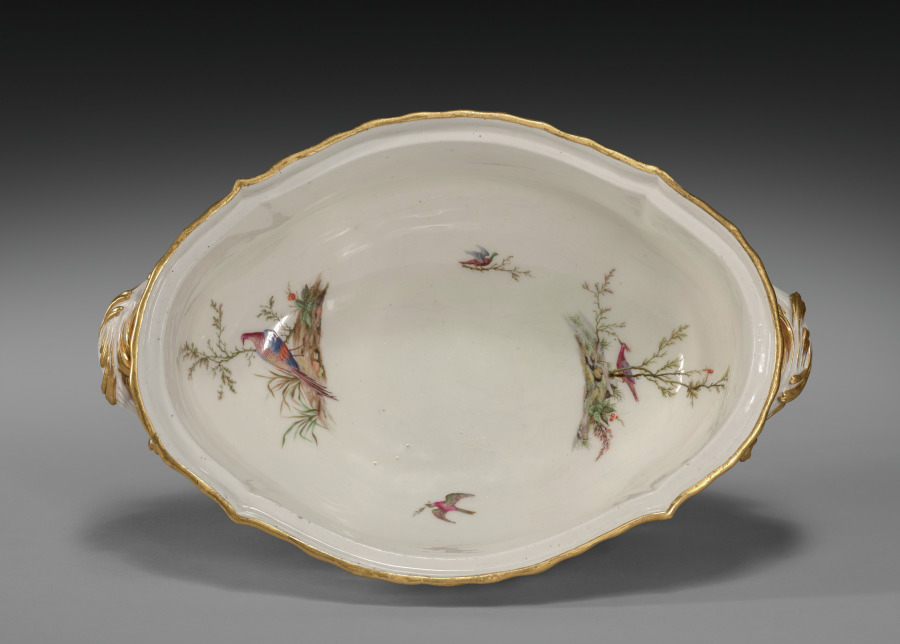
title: Tureen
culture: France, Vincennes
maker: Vincennes Porcelain Factory (France, 1740–56)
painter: attributed to Louis-Denis Armand (French, active c. 1745–1783)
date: c. 1752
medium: soft-paste porcelain with enamel and gilt decoration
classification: Ceramic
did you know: This object was manufactured in soft-paste porcelain, a material used by many European porcelain factories before they were able to emulate the hard-paste porcelain of China and Japan.